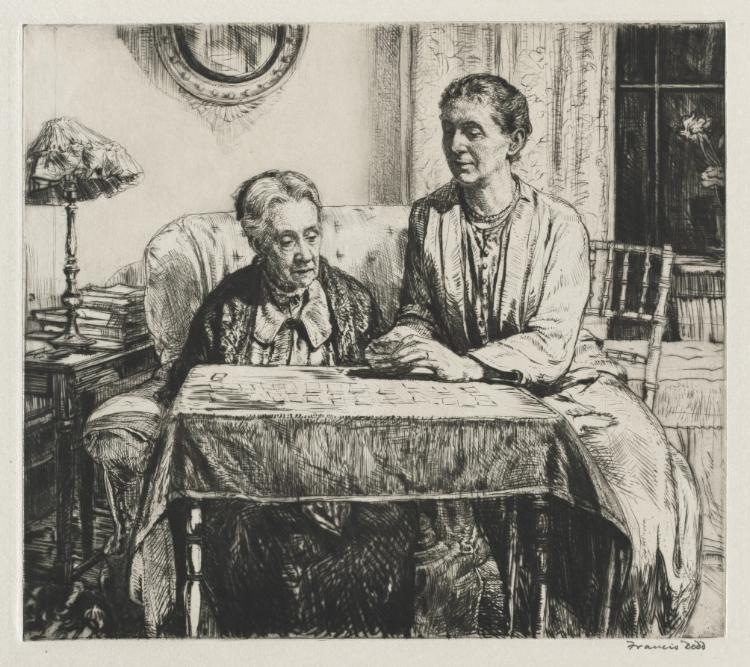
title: Patience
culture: England, 20th century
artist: Francis Dodd (British, 1874–1949)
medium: drypoint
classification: Print